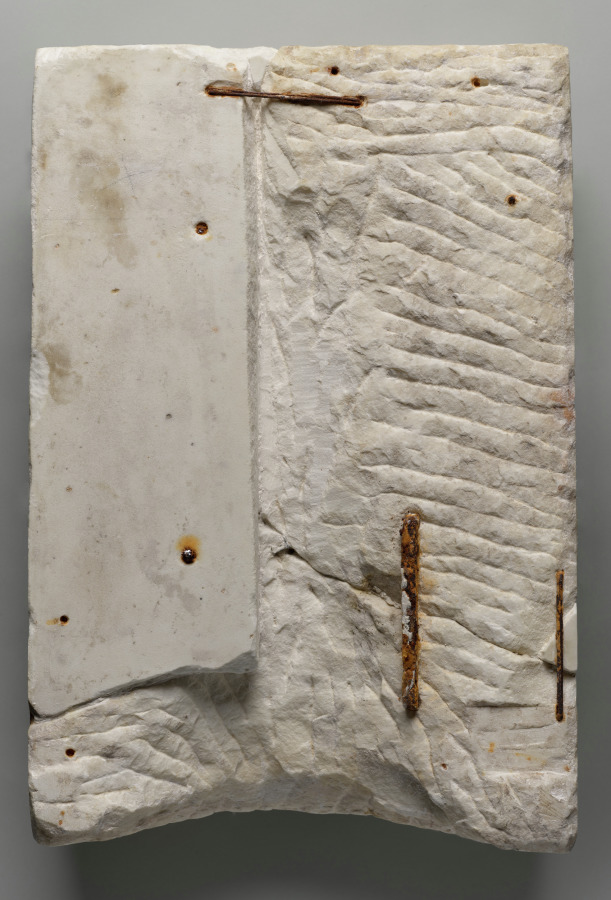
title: Aurelius Antoninus Pius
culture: Italy, Lombard School, late 15th century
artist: Gregorio di Lorenzo (Italian, c. 1436–1504)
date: late 1400s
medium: marble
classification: Sculpture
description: A laurel wreath rests on this Roman emperor’s finely articulated corkscrew curls, underscoring his military triumphs. While many ancient and classically inspired marble sculptures were painted, the survival of pigments is rare. In addition to the vibrant green coloring, traces of gold also remain on the leaves.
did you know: The artist can be identified by his distinctive flame-shaped curls forming the beard.